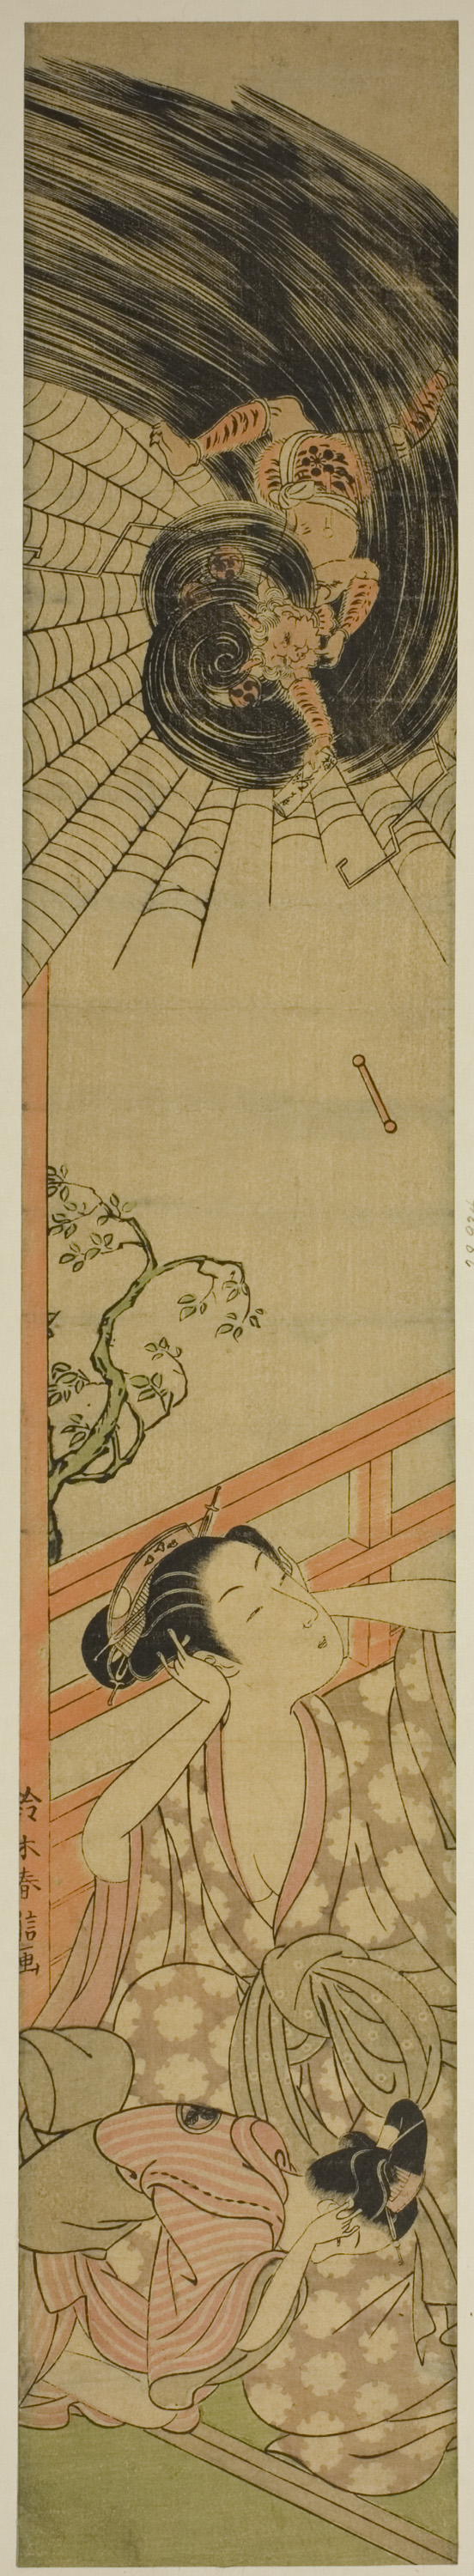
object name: Print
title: The Smitten Thunder God Delivering a Love Letter to a Courtesan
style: Japanese (culture or style)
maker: Suzuki Harunobu 鈴木 春信; Japanese, 1725 (?)-1770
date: c. 1767/68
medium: Color woodblock print; hashira-e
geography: Japan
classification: woodblock print; print; asian art